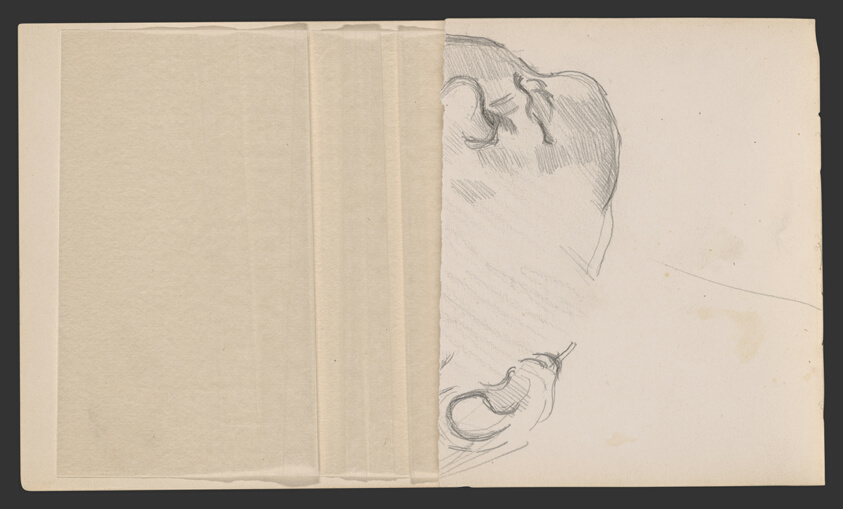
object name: Drawing and Watercolor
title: Sketchbook No. 2 (L'Estaque)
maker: Paul Cézanne; French, 1839-1906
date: 1875–86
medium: Graphite and pen and ink drawings on paper, bound into a book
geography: France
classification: sketchbook; graphite; prints and drawing; paper